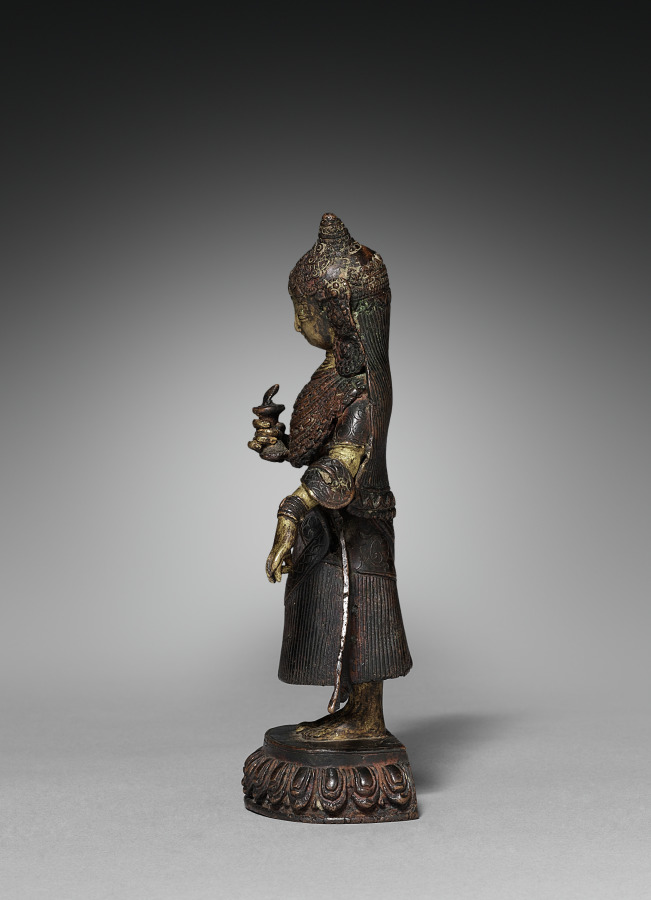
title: Royal Female Donor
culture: Nepal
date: c. 1500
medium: bronze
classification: Sculpture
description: Carrying a lamp in one hand, this female figure draped in finery was probably included as the donor of a sculptural group. She wears a complex headdress consisting of a network of beads and plaques joined together, ending in a bell at her forehead and crowning a long cloth that reaches to her waist. Her position on a lotus flower may indicate the transcendent state she attained as a result of the karmic merit of her donation.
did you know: The pleated skirt tied with a scarf around her waist is characteristic of Nepal.